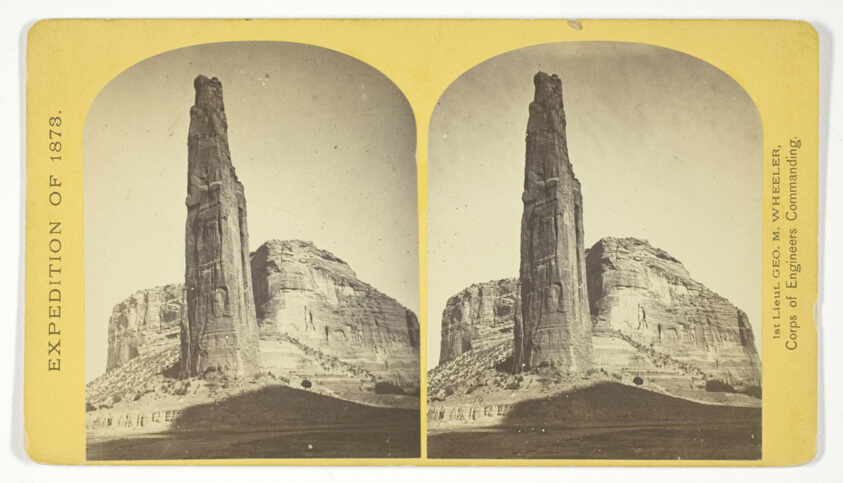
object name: Photograph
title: Explorers Column, Cañon de Chelle, Arizona. This shaft is the work of nature, and is about 900 feet in height; base about 70 by 110 feet. It stands near the center of the Cañon, and it is almost impossible to believe that it is not the work of human hands, No. 23 from the series "Geographical Explorations and Surveys West of the 100th Meridian"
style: 19th century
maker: Timothy O'Sullivan (American, born Ireland, 1840–1882); commissioned by George Wheeler for the War Department, Corps of Engineers, U.S. Army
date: 1873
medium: Albumen print, stereo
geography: United States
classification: stereograph (albumen); photography; photograph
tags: Collected by Hugh Edwards, Geographical Explorations and Surveys